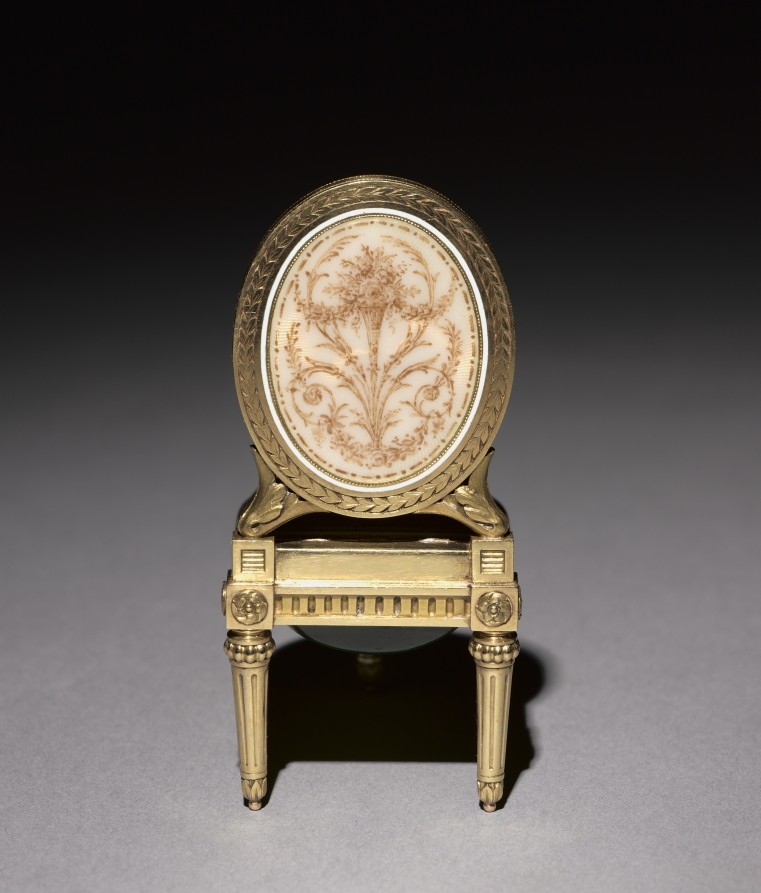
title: Miniature Bathroom Chair (Bidet)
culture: Russia, St. Petersburg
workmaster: Henrik Wigström (Russian, 1862–1923)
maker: House of Fabergé (Russian, 1842–1918)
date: 1908–17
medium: gold, nephrite, enamel, pearls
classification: Miscellaneous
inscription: Kokoshnik, 72, lower case alpha; 72; H.W. [initials of worksmaster Henrik Wigström]; Fabergé; 25256 [scratched].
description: The giving of small precious objects as intimate gifts between family members within the imperial court was spurred by the House of Fabergé's seemingly endless supply of bejeweled utilitarian objects decorated as expensively as possible, such as this stamp moistener disguising as an exquisite miniature bathroom chair (bidet) in the Louis XVI taste of the late 1700s.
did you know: The seat of this miniature bathroom chair cleverly opens to reveal a small compartment probably containing a damp sponge or ball of cotton to moisten stamps on a desk.